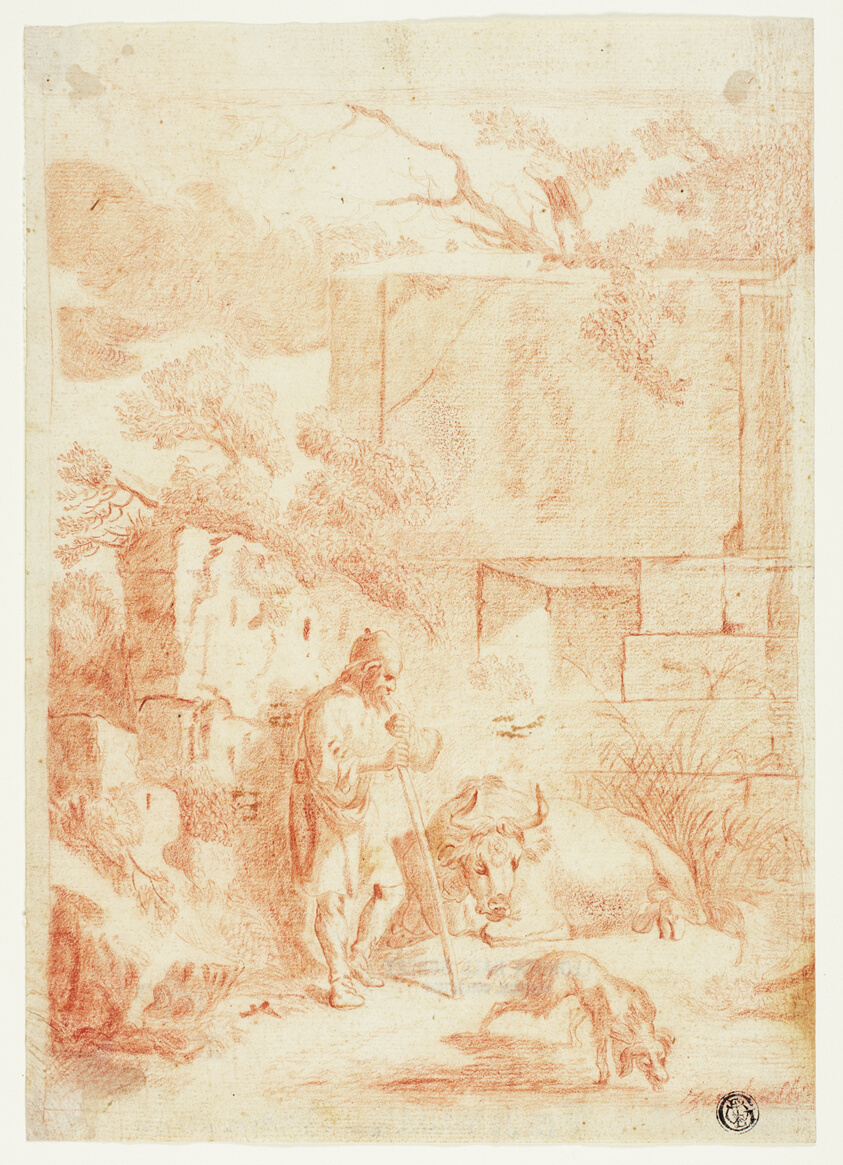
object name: Drawing and Watercolor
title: Cowherd with Bull and Dog in Ruins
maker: Possibly after Johann Heinrich Roos; German, 1631-1685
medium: Red chalk on ivory laid paper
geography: Germany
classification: chalk; drawings (visual works); prints and drawing